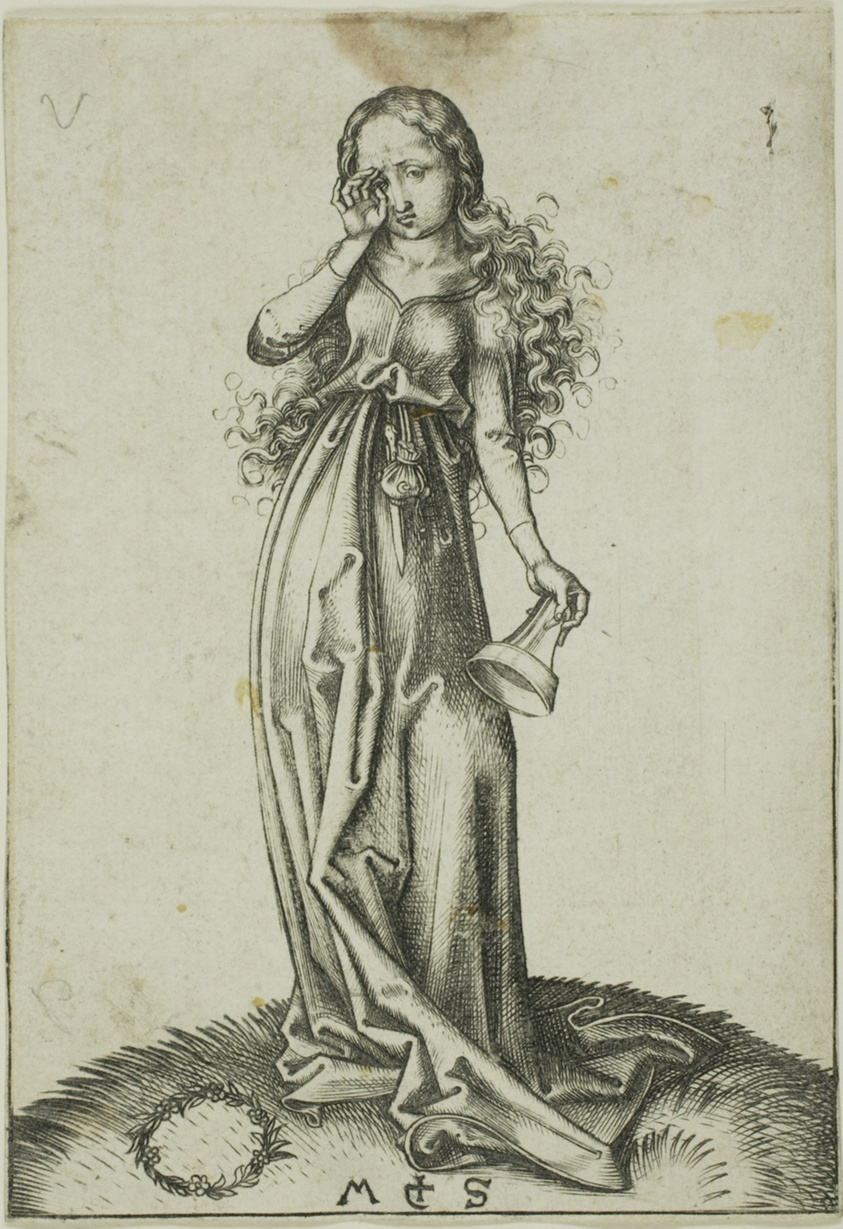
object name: Print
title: The Third Foolish Virgin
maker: Martin Schongauer (German, c. 1430/50-1491)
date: 1480-1491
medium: Engraving on paper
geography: Germany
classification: engraving; print; prints and drawing